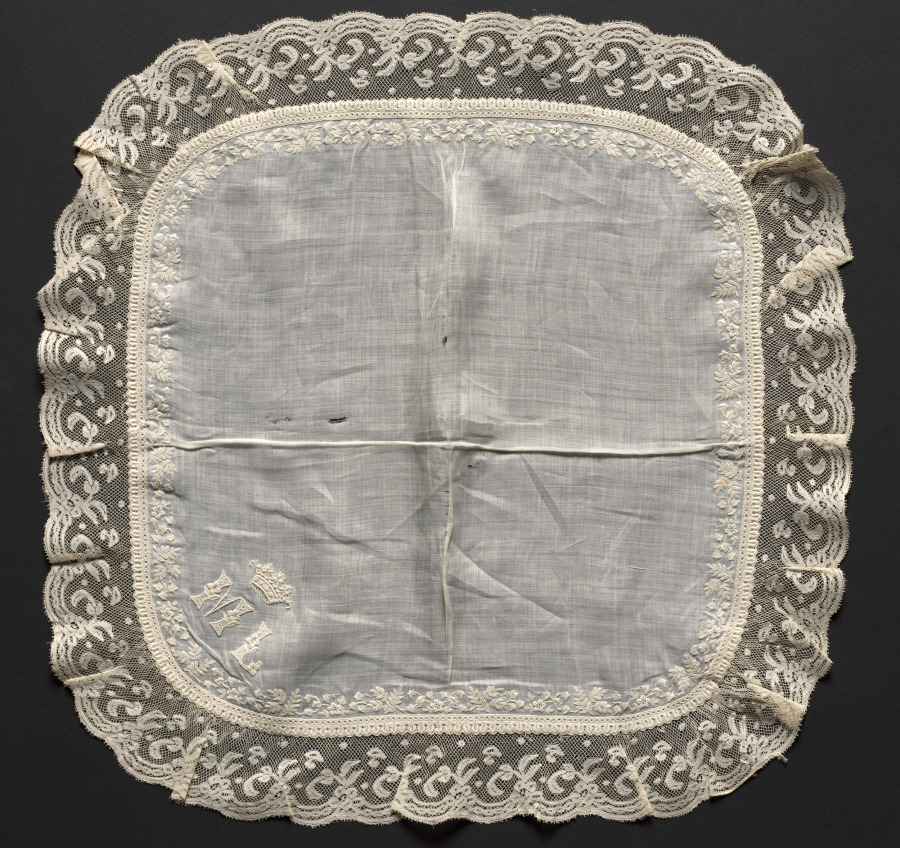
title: Lace Handkerchief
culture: Switzerland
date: 1800–1820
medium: Plain weave linen center: bobbin lace (Valenciennes) and embroidered edging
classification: Embroidery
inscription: in one corner "M.L." with coronet above.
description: In one corner, this handkerchief has a monogram with the initials M. L. There is a coronet above the initials.